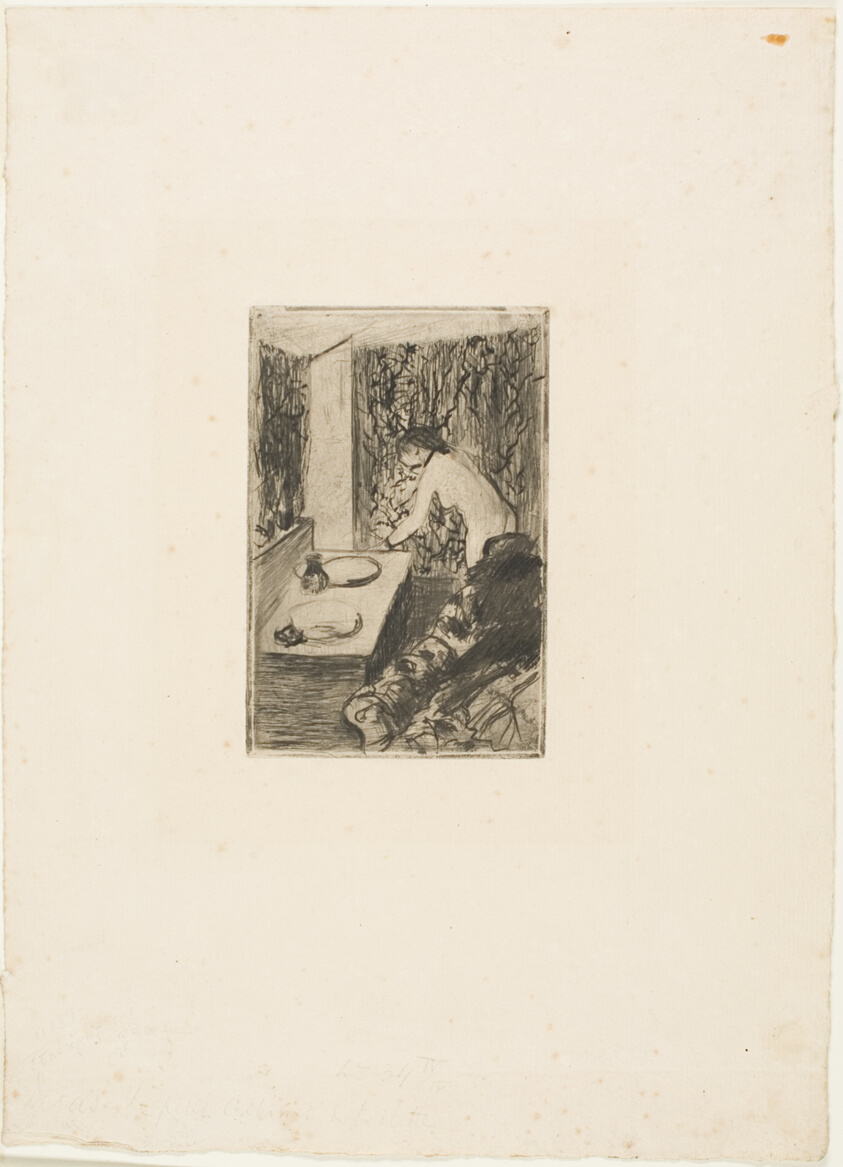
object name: Print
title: The Little Dressing Room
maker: Edgar Degas; French, 1834-1917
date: 1879–80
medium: Drypoint on cream laid paper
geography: France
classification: drypoint; print; prints and drawing; paper